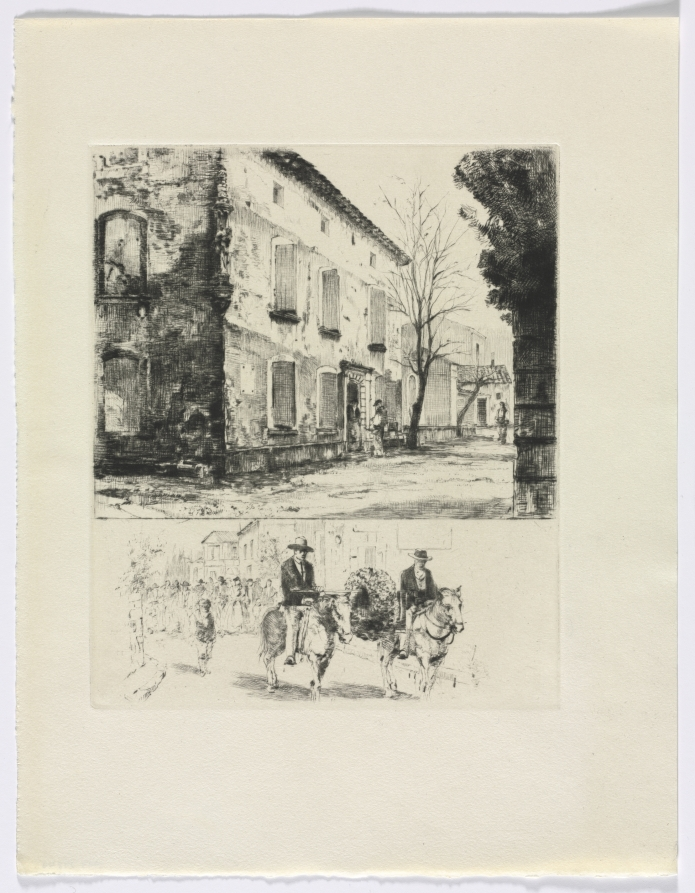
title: Frédéric Mistral: Mémoires et Recits by Frédéric Mistral: building/ figures on horse (insert after p. 224)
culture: France, 20th century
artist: Auguste Brouet (French, 1872–1941)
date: 1937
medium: etchings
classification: Portfolio